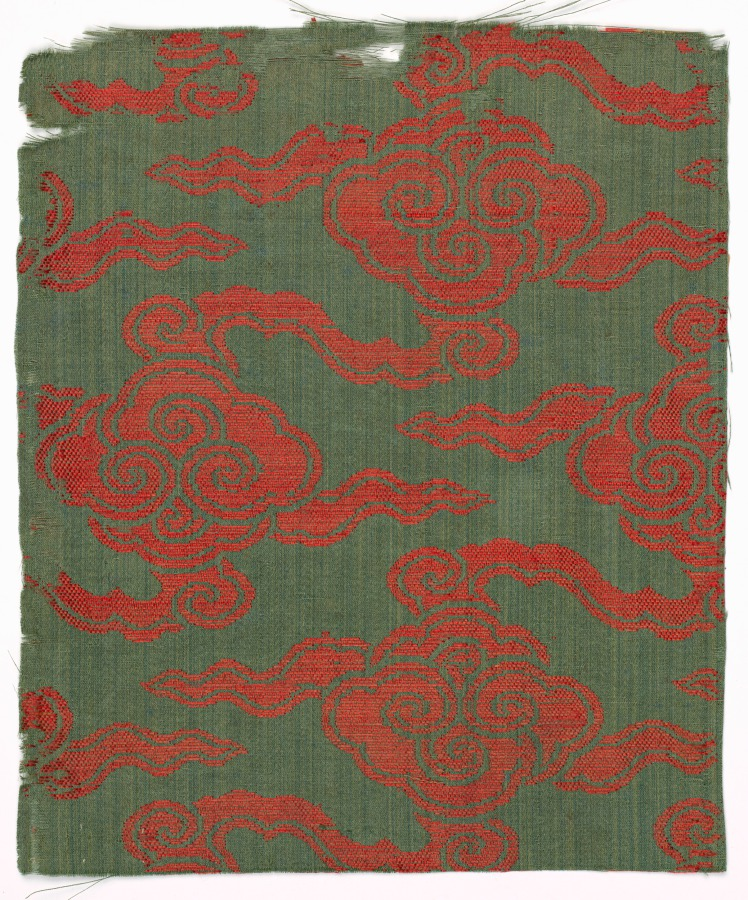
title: Fragment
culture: China, Qing dynasty (1644-1911)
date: 1680–1720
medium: silk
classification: Textile